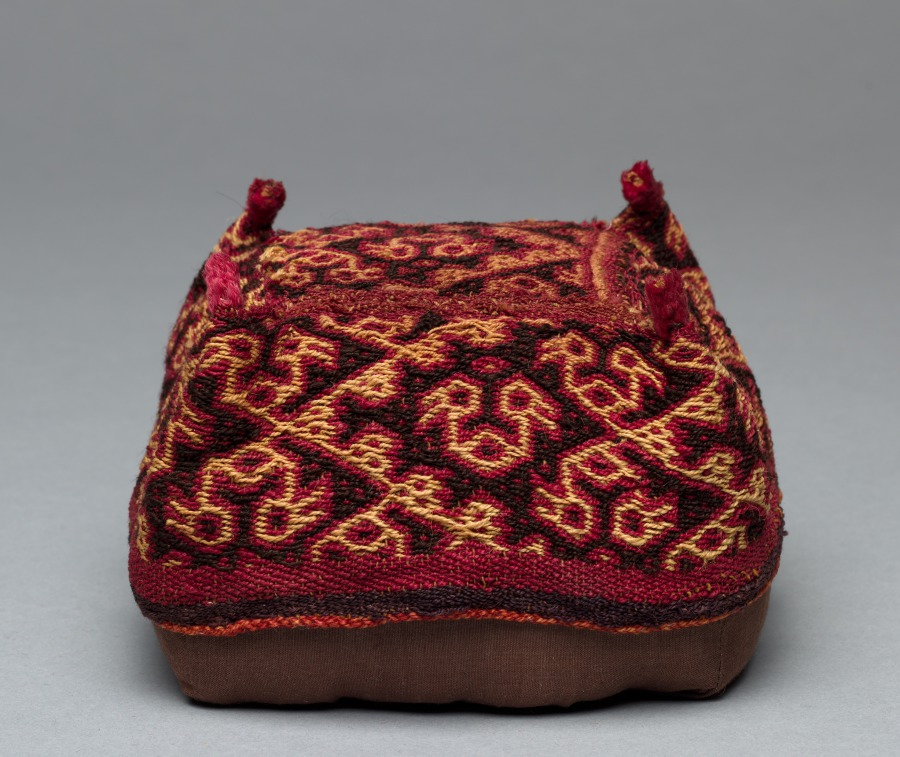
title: Four-Cornered Hat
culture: Peru, South Coast, Ica Valley, Inca Culture, 15th-16th century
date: c. 1400–1532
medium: camelid fiber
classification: Textile